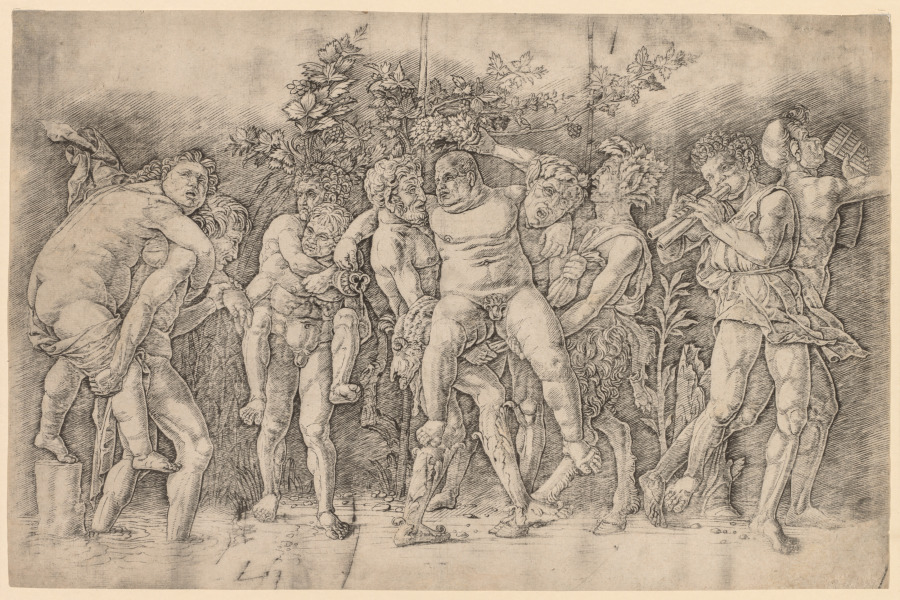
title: Bacchanal with Silenus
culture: Italy, 15th century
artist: Andrea Mantegna (Italian, about 1431–1506)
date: 1481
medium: engraving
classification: Print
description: This print was probably conceived by Andrea Mantegna as the right side of Bacchanal with a Wine Vat, which shows Bacchus crowned. Here, the central figure is also crowned, but unlike the wine god, he appears saturated with drink. The scene may come from the Roman poet Virgil (70–19 BCE). He described Bacchus’s teacher, Silenus, roused from a drunken sleep by two satyrs and a maenad and incited to sing so that his companions could dance. Silenus’s great wisdom was said to be generated by wine, but Renaissance artists more typically portrayed him as the embodiment of overindulgence.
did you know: Like most artists in Renaissance Italy, Mantegna was often inspired by ancient Greek and Roman art. In this print, the revelers are positioned in the foreground of a shallow picture plane, reminding savvy viewers of a Roman frieze.